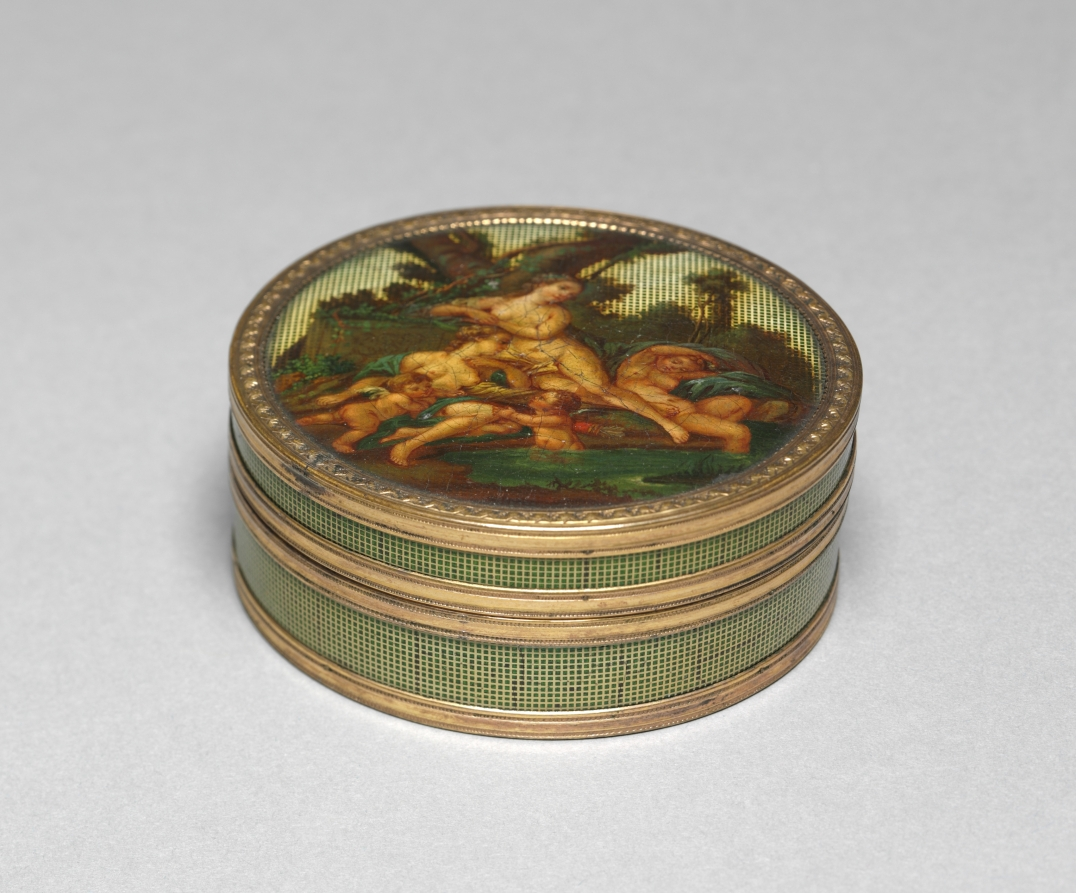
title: Snuff Box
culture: France, 18th century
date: 1700s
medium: wood decorated with lacquer with gold or gilt metal mounts, lined in tortoiseshell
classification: Miscellaneous